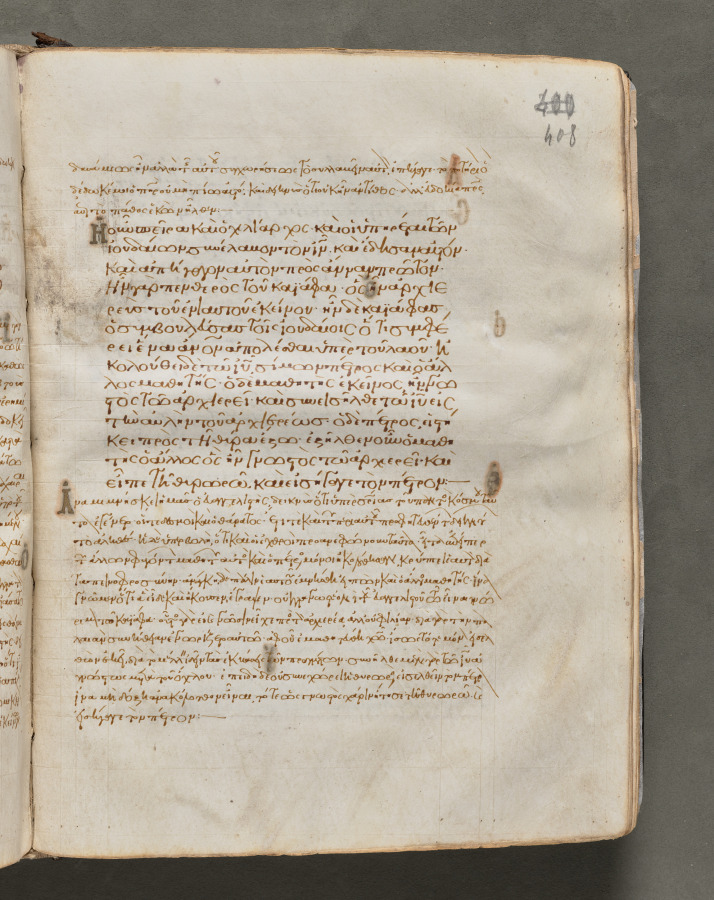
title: Text, folio 408 (recto), from a Gospel Book with Commentaries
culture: Byzantium, Constantinople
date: c. 1000–1100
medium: ink, tempera, and gold on vellum; leather binding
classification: Bound Volume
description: Each of the four gospels in this book opens on a page with brilliantly illuminated borders depicting the author of the text as well as birds—principally peacocks, symbols of the immortality of the soul—and fountains, representing the fountain of life and the salvation of the soul. This volume consists of 428 leaves with texts in Greek. Its level of sophistication suggests that it was probably written and decorated in a monastery in Constantinople.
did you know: Gospel books were carried in procession through Byzantine churches.